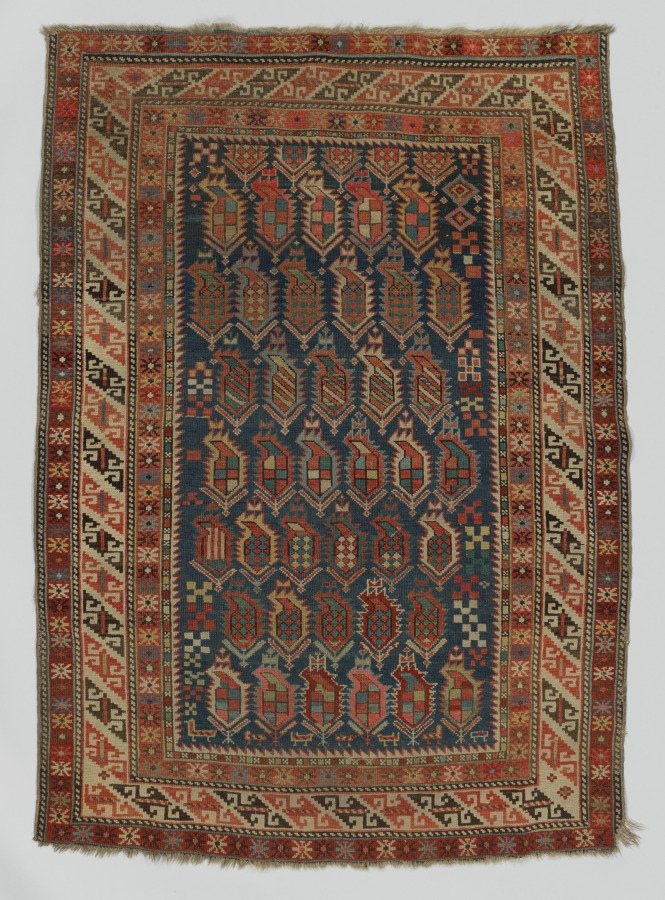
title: Carpet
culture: Dagestan, 19th-20th century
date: 19th-20th century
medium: Ghiordez knot; wool and cotton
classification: Carpet